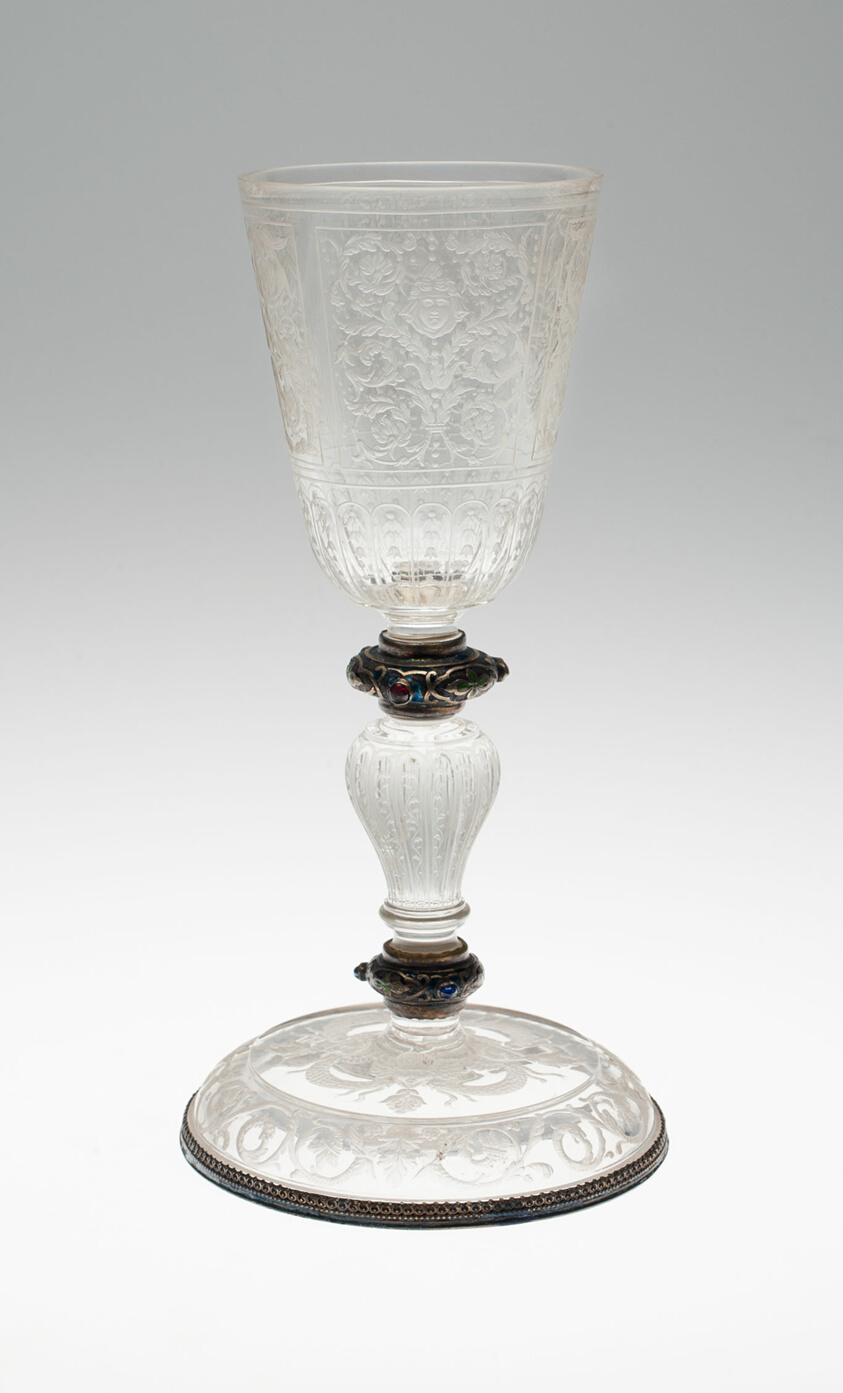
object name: Decorative Arts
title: Goblet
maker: Austrian, Vienna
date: 19th century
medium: Rock crystal, stones, and silver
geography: Vienna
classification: jewelry; european decorative arts; decorative arts